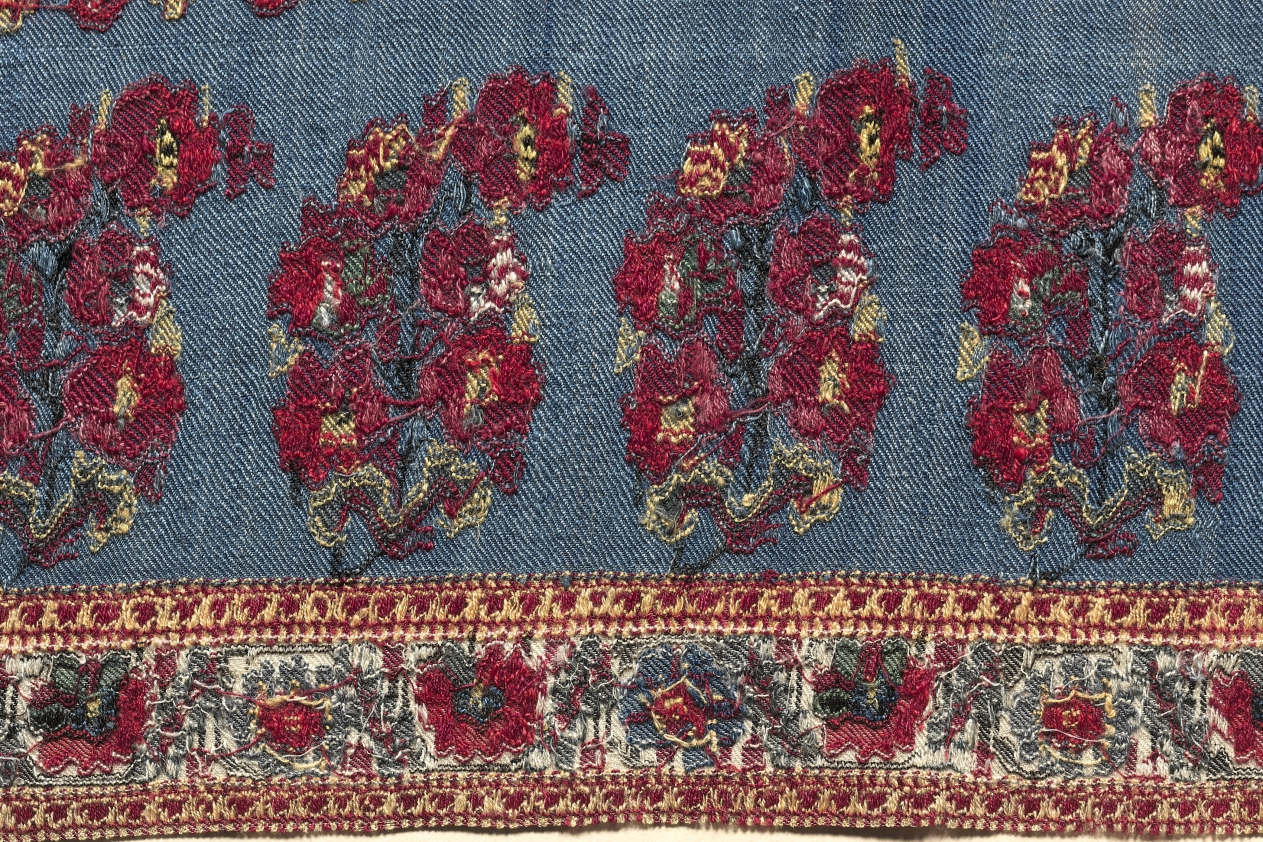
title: Shawl with boteh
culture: India, Kashmir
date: 1820–1830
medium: 2/2 twill tapestry weave, double interlocked: wool, possibly pashmina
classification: Textile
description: Thousands of luxurious shawls imported from Kashmir, India, were status symbols that European-manufactured imitations could not equal. Those woven in Paisley, Scotland, gave rise to the popular term paisley. Their representation in portraits records the evolution of shawl fashions, which helps to date surviving examples. The coveted quality of Kashmir shawls was achieved with luxurious fine goat hair woven in twill tapestry to form small colorful blossoms. Such shawls are lightweight, supple, and warm. A plethora of blossoms arranged in small vases on stands form the large paisley or boteh motifs, while smaller versions enliven the sides of the field. Such floral displays evolved from blossoming plants possibly in 16th-century India.